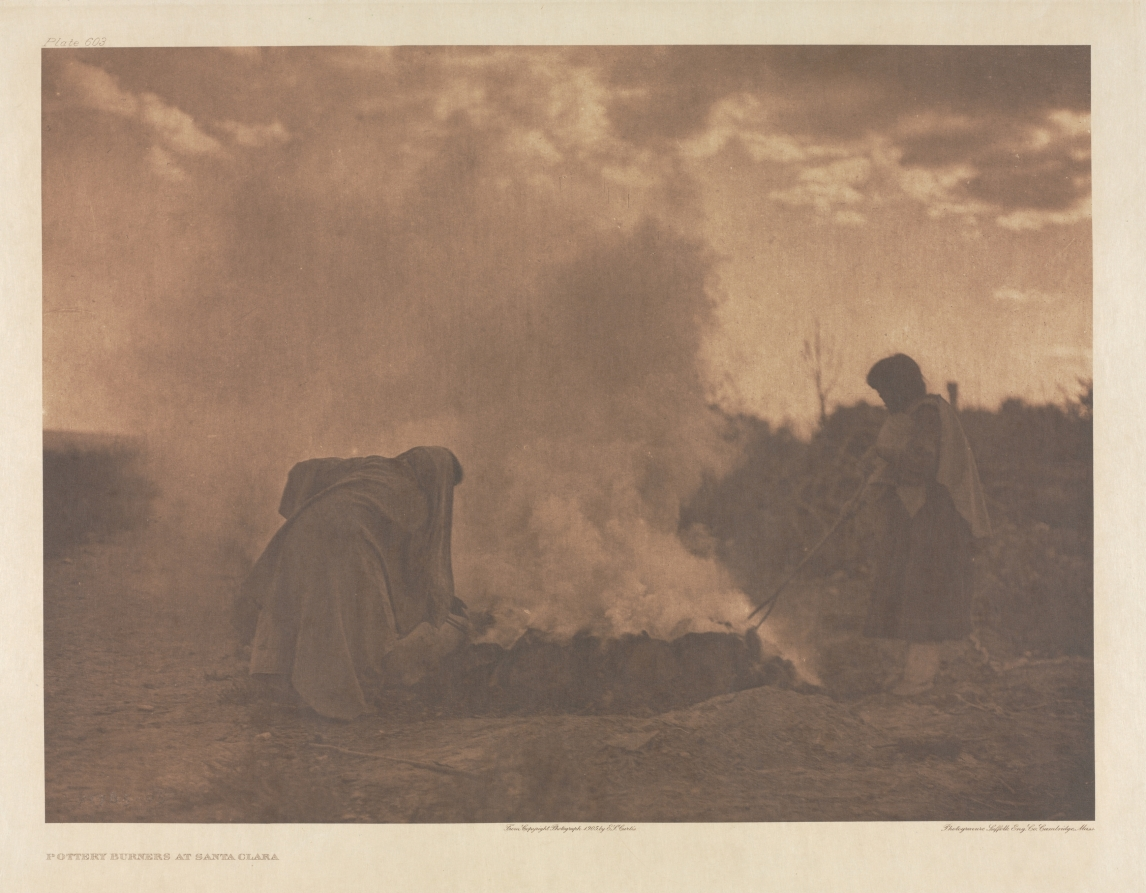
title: Portfolio XVII, Plate 603: Pottery Burners at Santa Clara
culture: America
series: The North American Indian: being a series of Portfolios picturing and describing the Indians of the United States, the Dominion of Canada, and Alaska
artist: Edward S. Curtis (American, 1868–1952)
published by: The University Press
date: 1905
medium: photogravure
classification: Portfolio